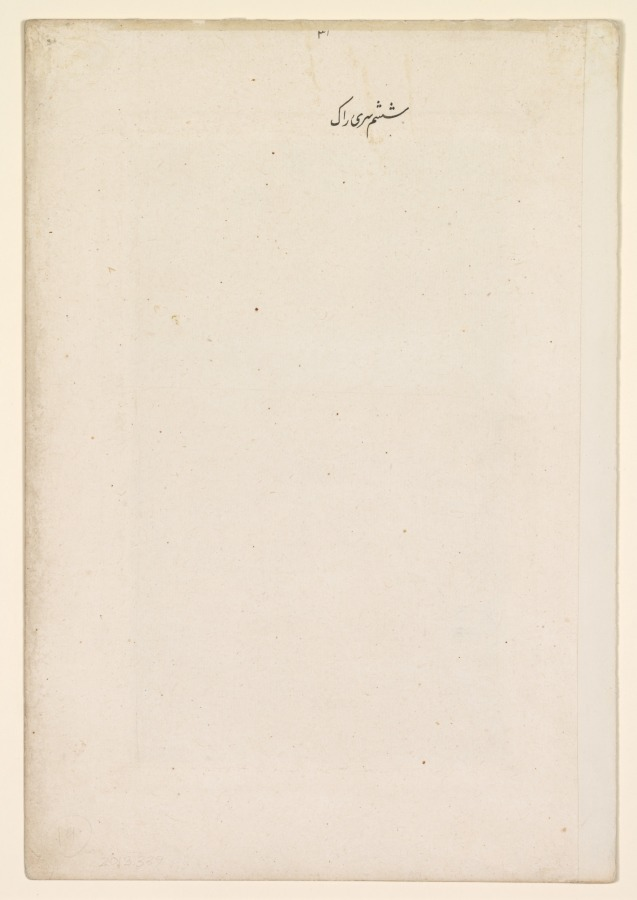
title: Shri Raga: An Illustration from a Ragamala Series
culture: India, Mughal, 18th century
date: c. 1740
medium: Gum tempera and gold on paper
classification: Painting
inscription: Inscription at top, Persian numerals: 31; Persian inscriptions on verso, in nasta‘liq script: 31 Sixth, Shri Raga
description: The verse associated with Shri Raga corresponds closely with this scene: His body, bluish in hue, is marvelously built. He is always graced with the company of auspicious Shri Lakshmi. He sits on a throne of gold, and before him Narada sits playing on his vina. He has decorated himself with garlands of flowers, and also with ornaments set with jewels. Shri raga is thus conceived in sentiment, of whom all learned men sing praises. The horse-headed figure claps his hands and accompanies the sage, wearing saffron garments and playing on the stringed instrument called a vina. He may be derived from the courtly commander of Indra, seen in the Jain manuscripts. Poppies bloom in the formal garden below the pure white terrace, and they are echoed by the oranges set on the windows of the house at the upper right.